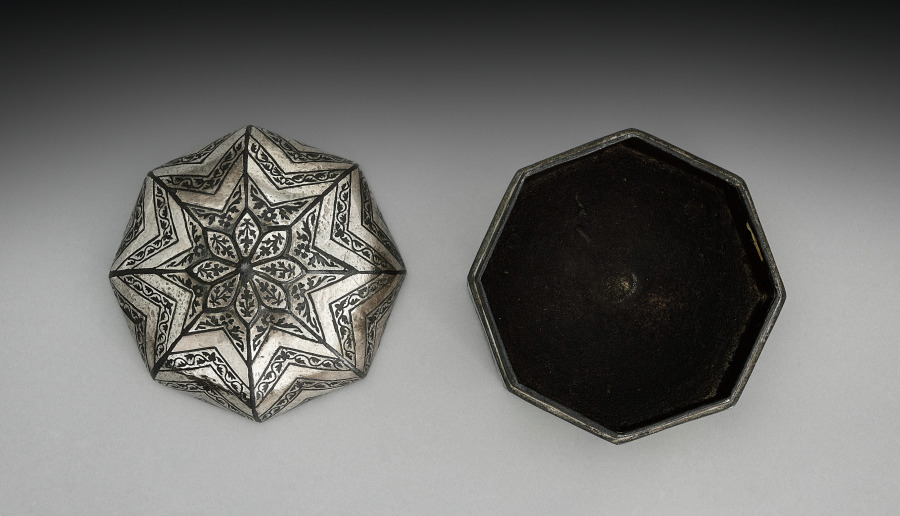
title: Bidri Pandan with Chevrons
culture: Southwestern India, Deccan, Karnataka, Bidar​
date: c. 1700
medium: Zinc alloy with silver overlay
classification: Metalwork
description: A pandan is a lidded vessel for serving paan, which has been enjoyed in India for more than two thousand years. Paan is betel or areca nut mixed with lime powder, aromatics such as clove cinnamon, or cardamom, and wrapped in betel leaf. The whole packet is chewed after a meal as a mild stimulant and mouth freshener.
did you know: The lime powder in paan functioned as an ancient antacid after meals.